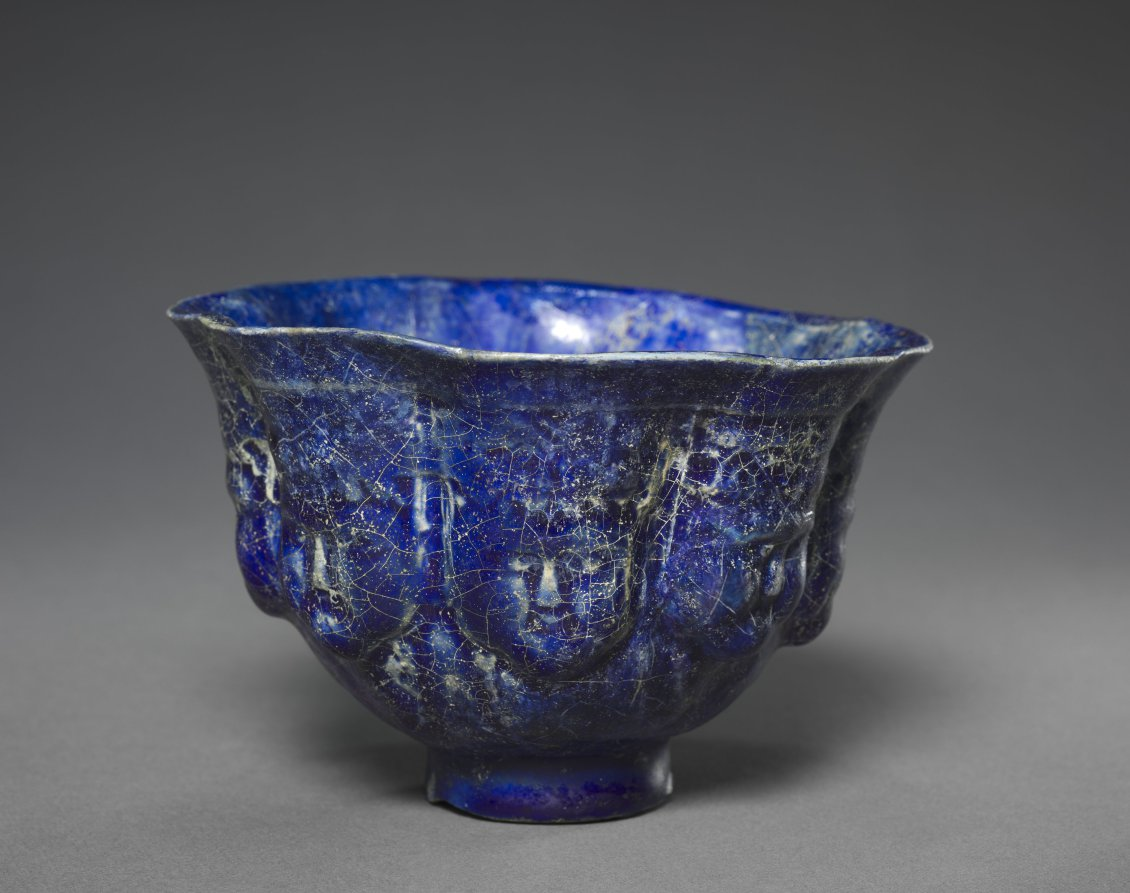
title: Bowl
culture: Iran, probably Kashan, Seljuk Period, 12th-13th Century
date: 1150–1220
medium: fritware with molded design under glaze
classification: Ceramic